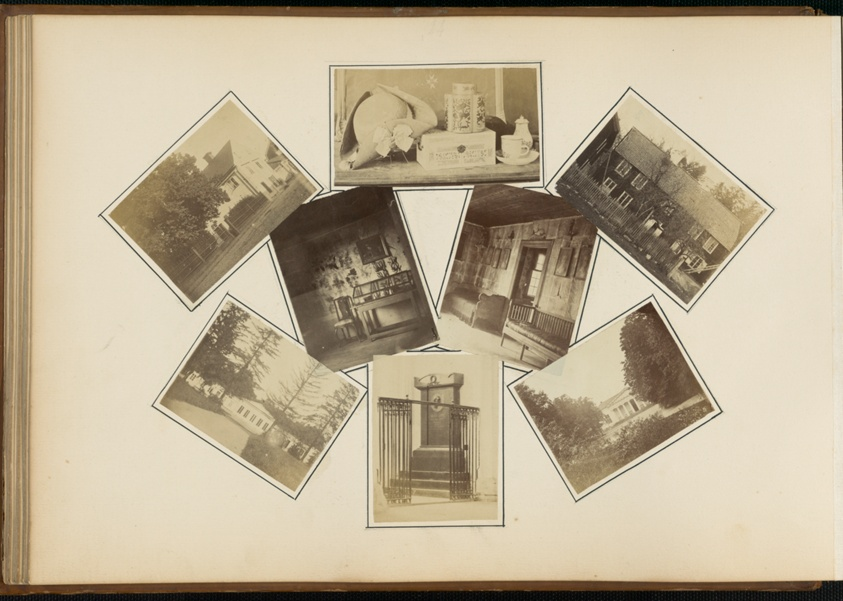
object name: Photograph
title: The Madame B Album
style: 19th century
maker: Marie-Blanche Hennelle Fournier (French, 1831–1906)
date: 1870s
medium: Albumen prints with ink (in album)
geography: France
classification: photograph; albumen silver print; photography